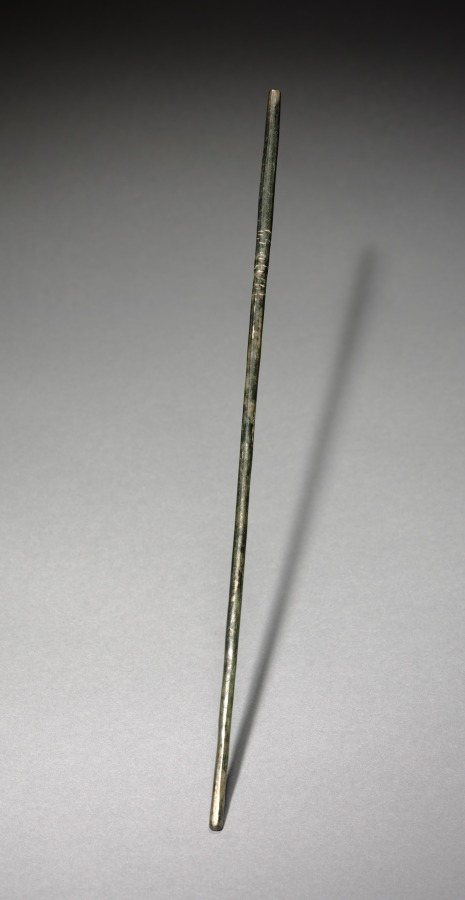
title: Pair of Chopsticks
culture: Korea, Goryeo dynasty (918–1392)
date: 918–1392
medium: bronze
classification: Metalwork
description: In Korea, chopsticks made of metal such as brass, silver, and gold were excavated from ancient tombs and ruins dated to the 500s at the earliest. Burial goods often include utilitarian objects such as table wares and utensils because the dead were believed to need them in the afterlife.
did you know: In contrast to the Chinese and Japanese, Koreans still prefer metal chopsticks (stainless steel and brass) to wooden ones.